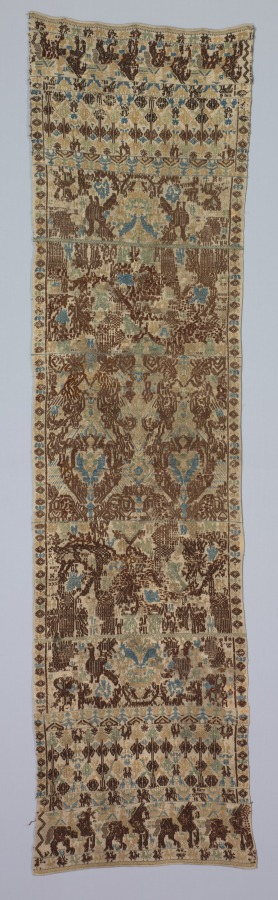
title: Saddle Cloth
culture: Italy, Abruzzi, 17th-18th century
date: 1700s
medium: embroidery; silk on linen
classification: Textile